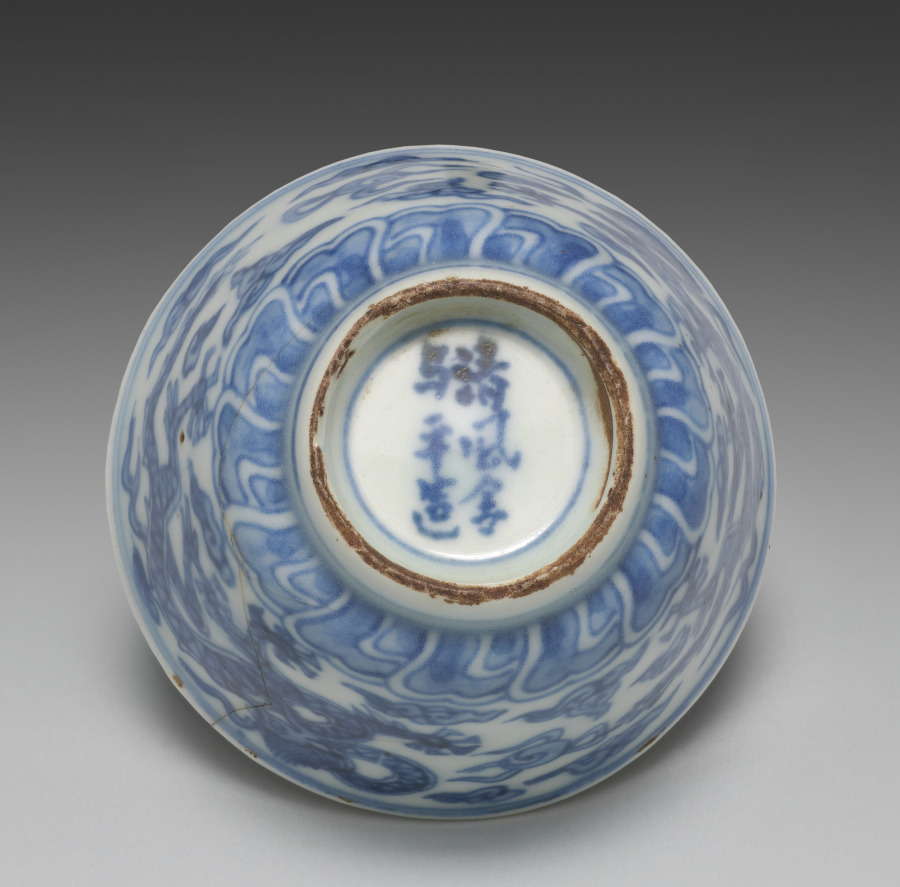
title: Cup from Tea Cups with Dragons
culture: Japan, Edo period (1615–1868)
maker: Seifū Yohei I (Japanese, 1801–1861)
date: 1840s–57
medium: One from a set of five tea cups; porcelain with underglaze blue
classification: Ceramic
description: Seifū Yohei I made both blue and white porcelains after Ming dynasty (1368–1644) Chinese wares fired in the kilns at Jingdezhen for export. He also made colorful stoneware in the style of his teacher, Nin’ami Dōhachi (Takahashi Dōhachi II) (1783–1855).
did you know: A small figure of an elephant serves as the handle for the lid.